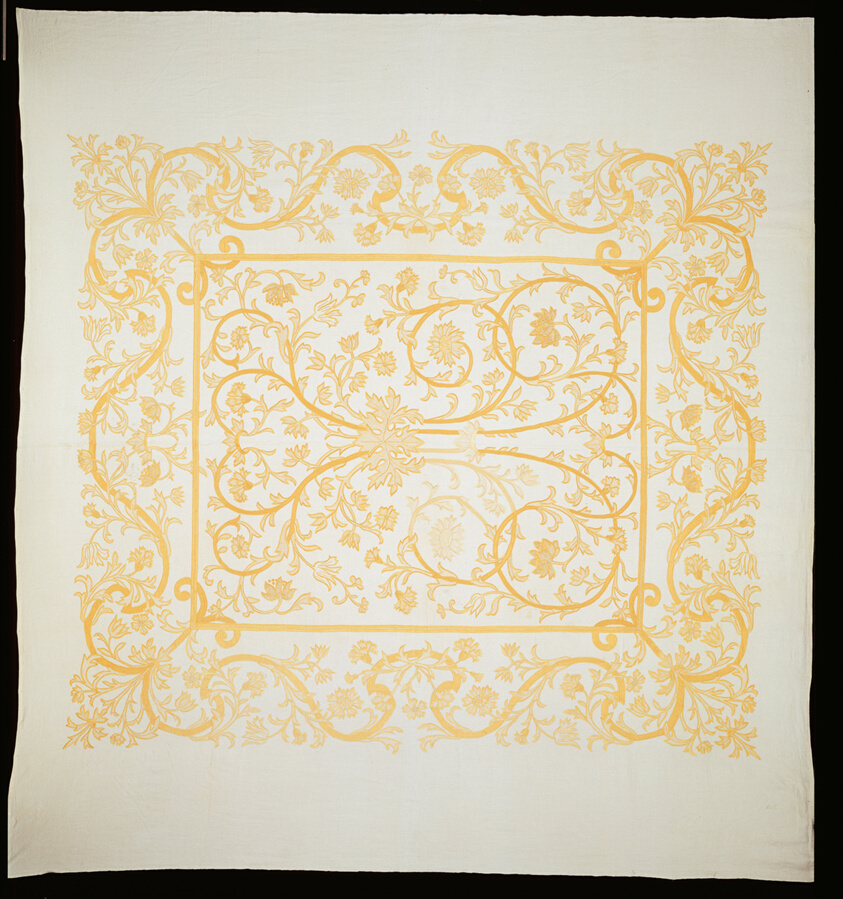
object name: Textile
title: Bedcover in the Arts and Crafts Style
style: Arts and Crafts Movement, british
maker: England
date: Early 20th century (based on 17th–century English designs)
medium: Linen, plain weave; embroidered with silk in back, satin, and stem stitches; French knots; two loom widths joined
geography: England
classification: textile; needlework (visual works)